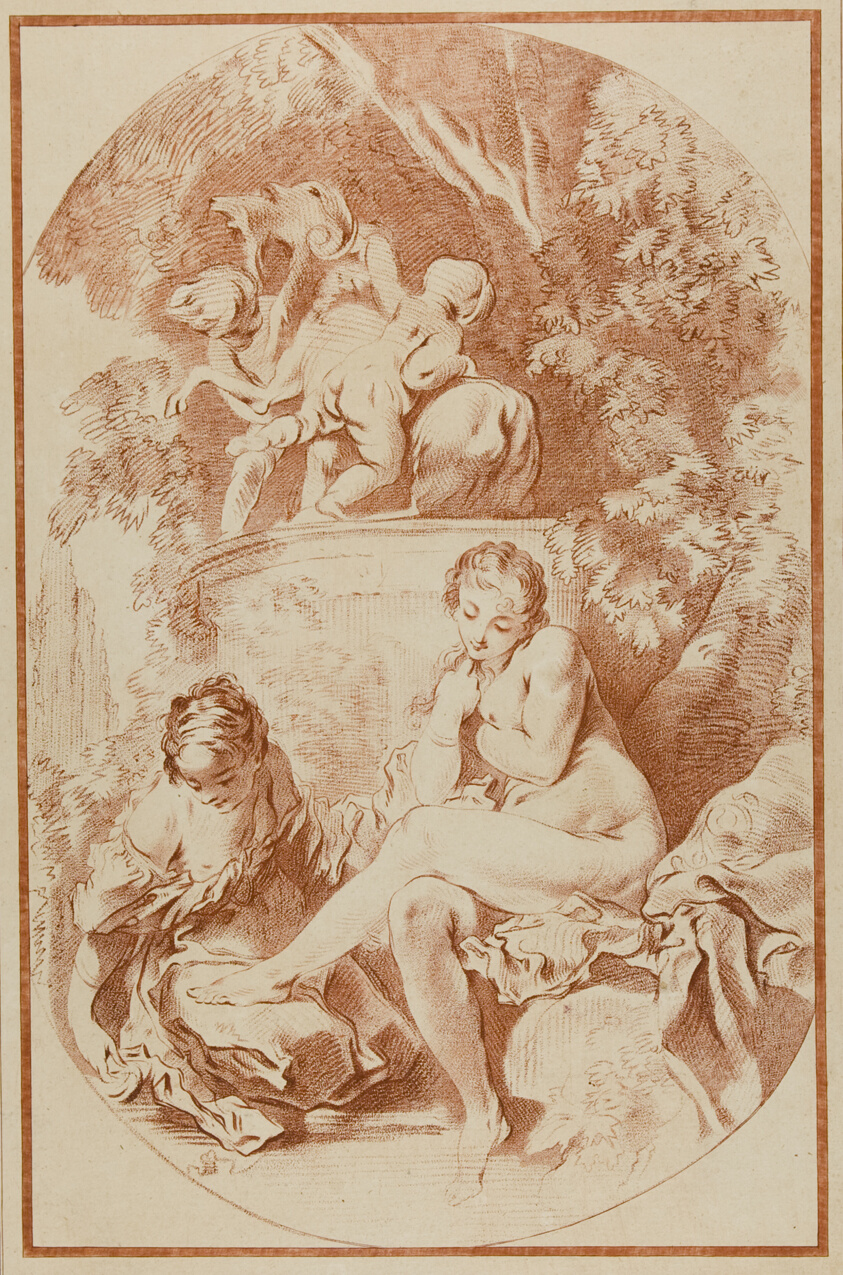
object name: Print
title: Bathsheba, from A Collection of Prints in Imitation of Drawings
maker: William Wynne Ryland (British, 1732-1783); after François Boucher (French, 1703-1770); published by John Boydell (British, 1719-1804), Benjamin White (British, c. 1725-1794), and Pietro Molini (Italian, c. 1729-1806)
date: 1764, published 1778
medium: Stipple engraving in sanguine on cream laid paper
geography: England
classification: engraving; print; prints and drawing